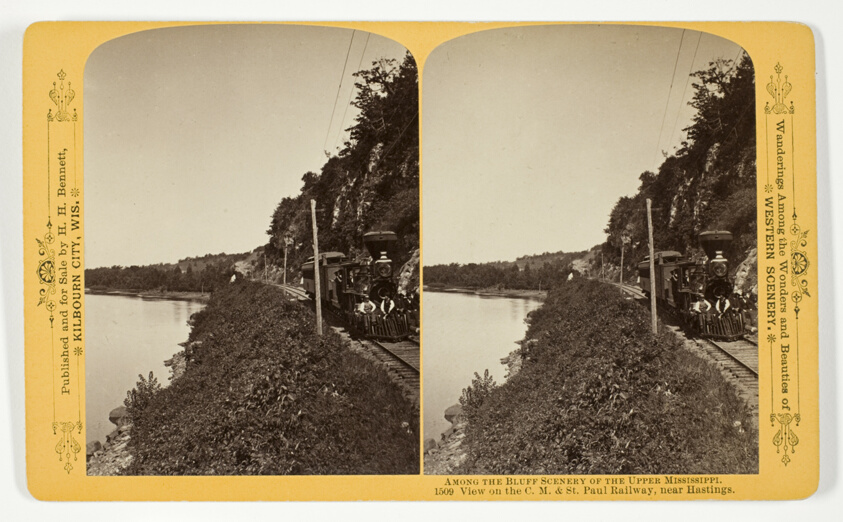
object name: Photograph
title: View of the C.M. & St. Paul Railway, near Hastings, No. 1509 from the series "Among the Bluff Scenery of the Upper Mississippi"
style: 19th century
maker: Henry Hamilton Bennett (American, born Canada, 1843-1908)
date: 1870/1908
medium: Albumen print, stereo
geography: Wisconsin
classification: photography; photograph; albumen silver print; stereograph (albumen)